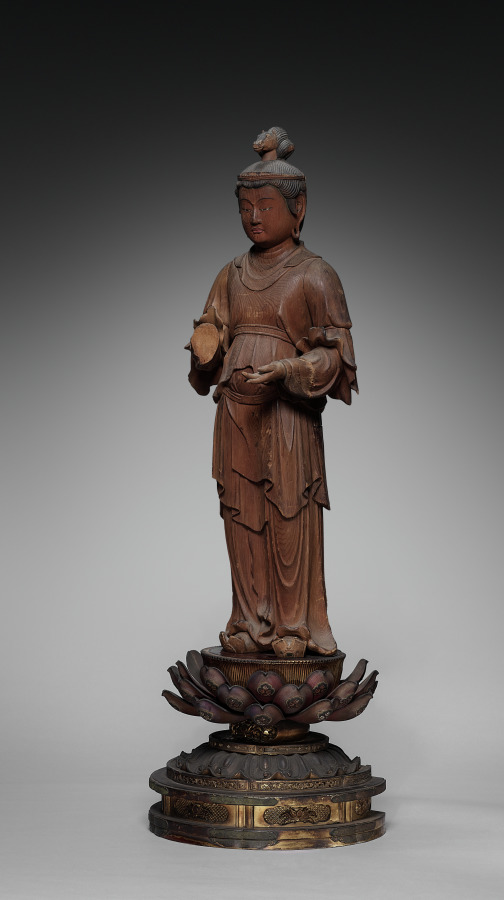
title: Batō (Horse-Headed) Kannon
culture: Japan, Kamakura period (1185–1333)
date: early 1300s, pedestal 1600s–1700s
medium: Wood with traces of color and gold; pedestal: wood with lacquer, color, and gold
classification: Sculpture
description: Batō Kannon, or Hayagriva Avalokiteshvara in Sanskrit, is the “horse-headed” form of the bodhisattva of compassion, who presides over the realm of animals in the Buddhist Six Realms of Transmigration (rebirth). A horse’s head appears in the hair of this sculpture to identify it. Bodhisattvas are beings who, though enlightened, choose to remain within the worlds of existence to help others. The six realms are heaven, hell, human, animal, hungry ghost, and ashura, or fierce supernatural entities.